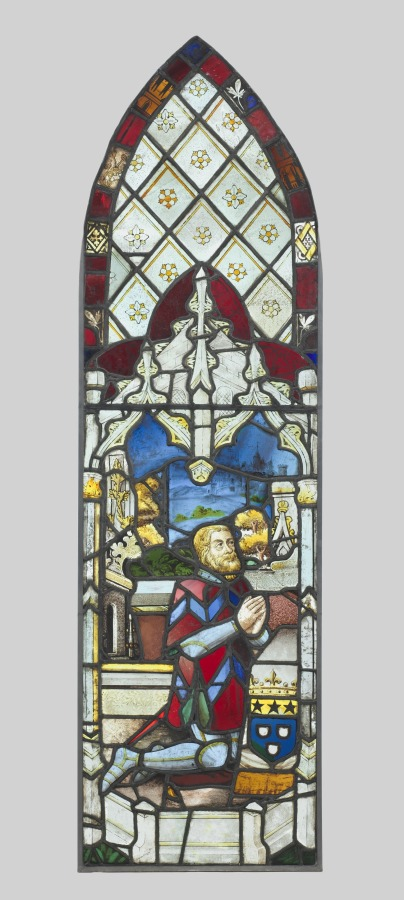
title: Pair of Stained Glass Panels with Male and Female Donor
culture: France, 15th century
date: c. 1480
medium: pot metal, white glass with silver stain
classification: Glass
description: The origin of these stained glass panels is unknown. They depict a male and female donor, presumably husband and wife, who gaze upon a now-lost central panel. The object of their devotions was likely a crucified Christ or a standing figure of the Virgin Mary. The man, dressed in armor, and the woman, wearing a bejeweled and richly embroidered gown, are accompanied by their not yet identified coats-of-arms. They are undoubtedly members of an aristocratic elite who commissioned these windows, perhaps for a family chapel.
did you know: The brilliant colors of this stained glass panel were produced by adding different materials to molten glass, creating a reaction that resulted in specific colors while the metal supports for the individual pieces of glass are made from pot metal, an alloy, or mixture, of copper and iron.